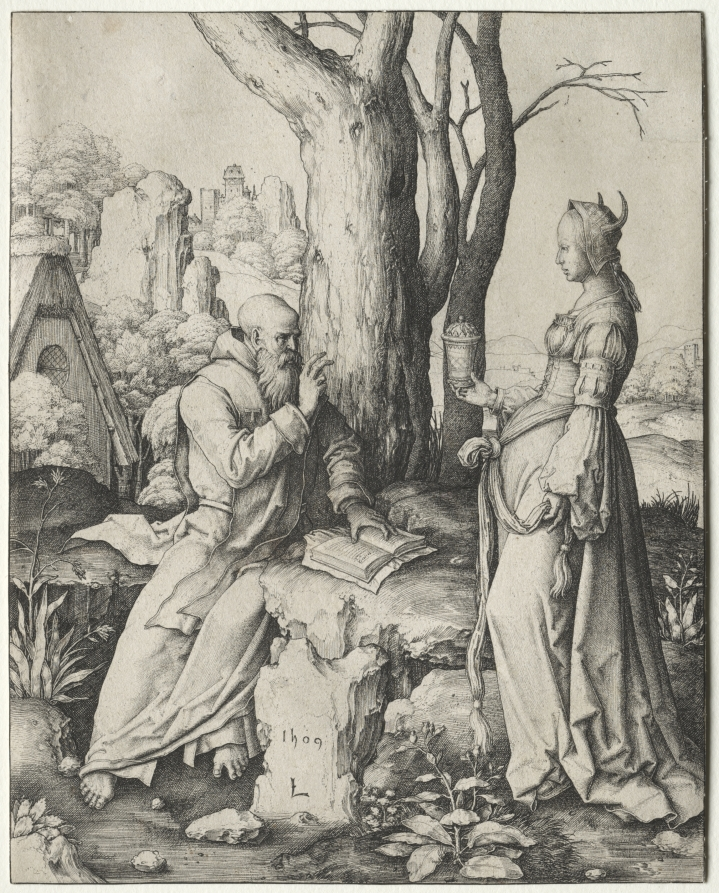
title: The Temptation of St. Anthony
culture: Netherlands, 16th century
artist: Lucas van Leyden (Netherlandish, 1494–about 1533)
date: 1509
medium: engraving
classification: Print